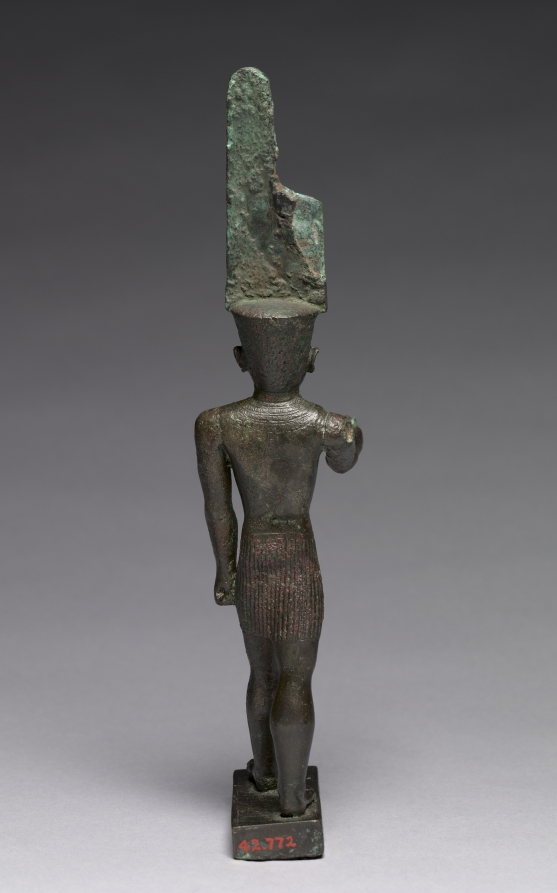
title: Statuette of Amen-Ra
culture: Egypt, Late period (715–332 BCE), Dynasty 26 or later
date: 664–30 BCE OR 664–330 BCE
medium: bronze, solid cast, inlaid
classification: Sculpture